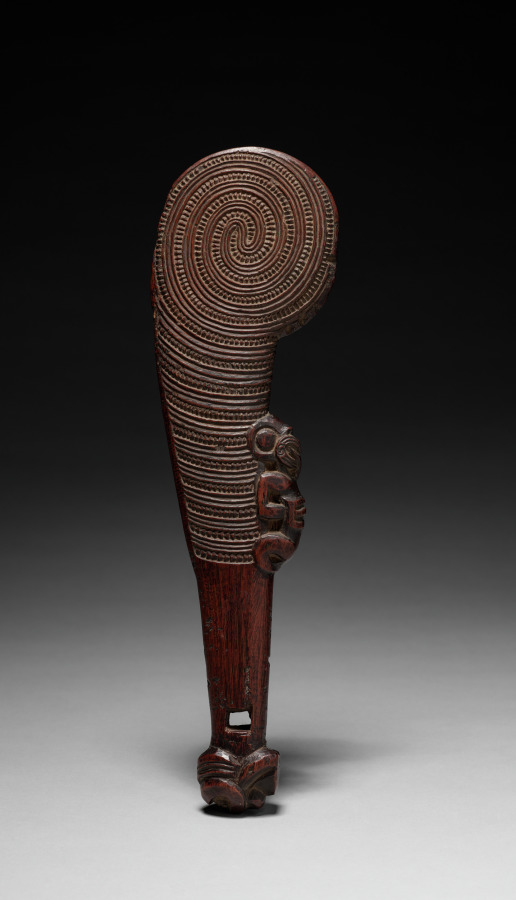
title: Short Club (Wahaika)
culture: Polynesia, New Zealand, Maori people, mid-19th Century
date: mid 1800s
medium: wood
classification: Sculpture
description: The wahaika, carried in a belt, was used by the Maori in hand-to-hand combat. Early, undecorated clubs were made of stone. Bone and wood clubs were decorated with increasingly complex carved designs. The small figure clinging to the side of this club may well represent the supernatural power (mana) of the weapon, while the face at the end of the grip expresses the aggression of combat.